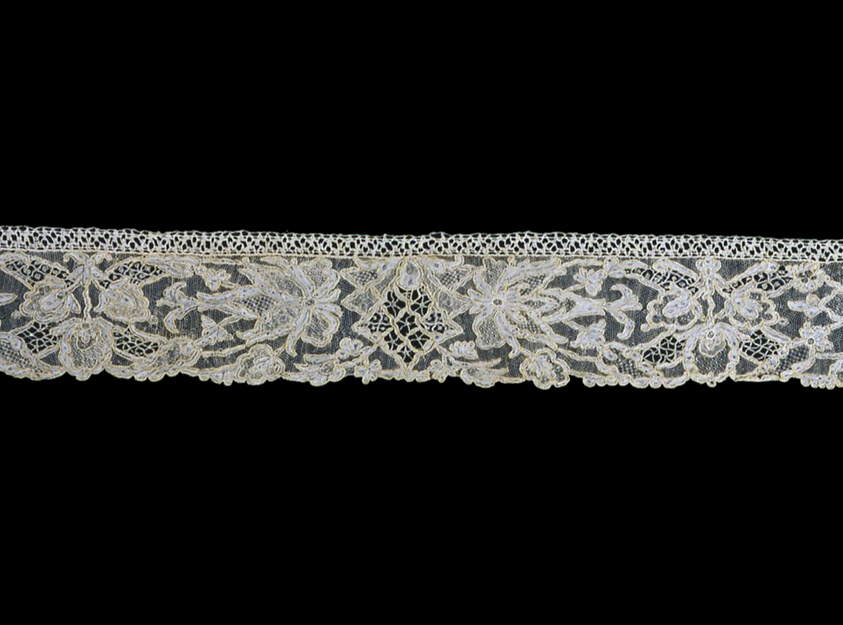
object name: Textile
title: Border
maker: France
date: 1830s/40s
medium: Linen, needle lace of a type known as "Point d'Alençon"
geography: France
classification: textile; lace - needle